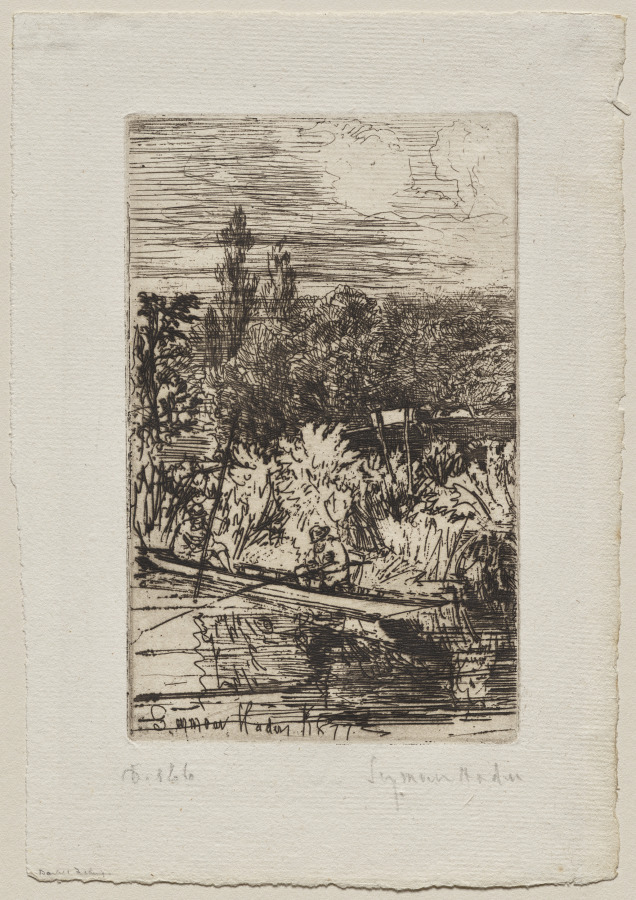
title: Barbel Fishing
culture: England, 19th century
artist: Francis Seymour Haden (British, 1818–1910)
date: 1877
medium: etching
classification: Print